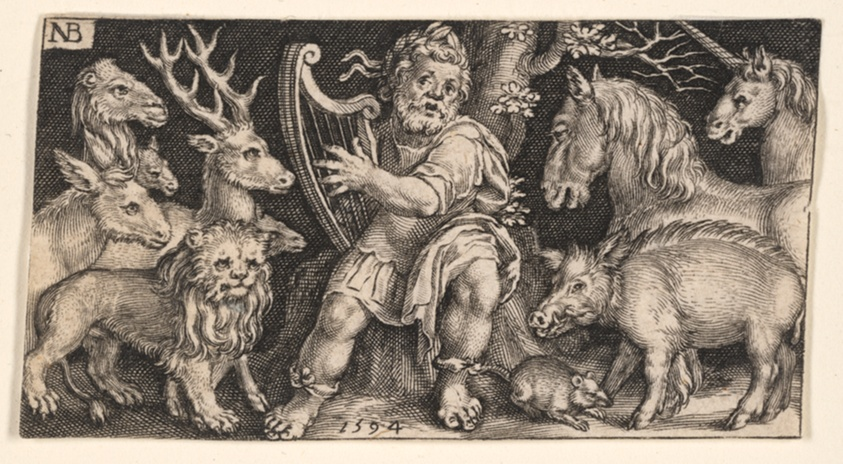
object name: Print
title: Orpheus from Fighting Chimeras and Scenes from Aesop's Fables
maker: Nicolaes de Bruyn (Flemish, 1571–1656)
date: 1594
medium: Engraving on paper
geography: Flanders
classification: engraving; paper; print; prints and drawing